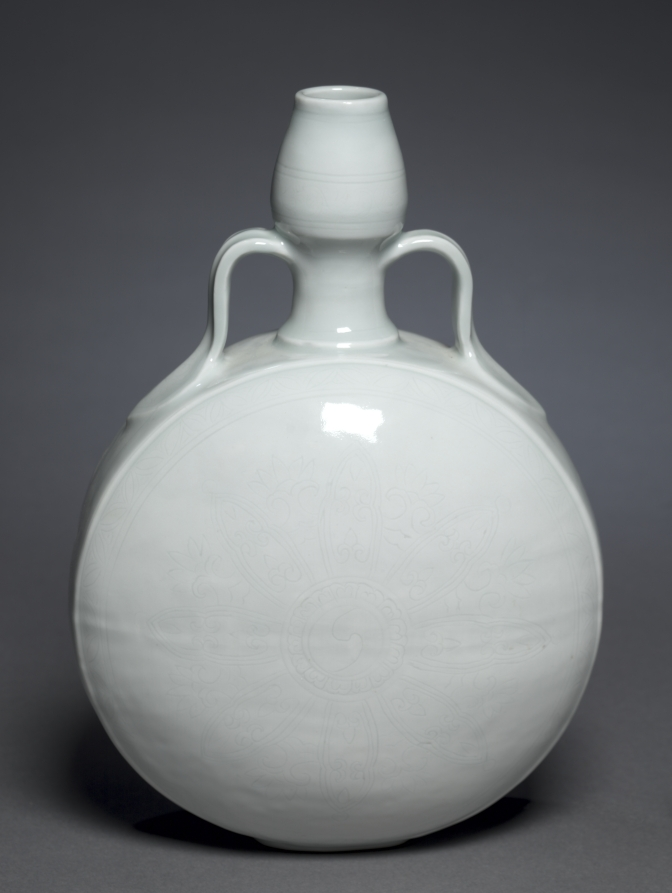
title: Gourd Flask with Floral Medallion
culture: China, Jiangxi province, Jingdezhen, Ming dynasty (1368-1644), Yongle period (1403-24)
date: 1403–24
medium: porcelain with incised decoration and white glaze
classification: Ceramic